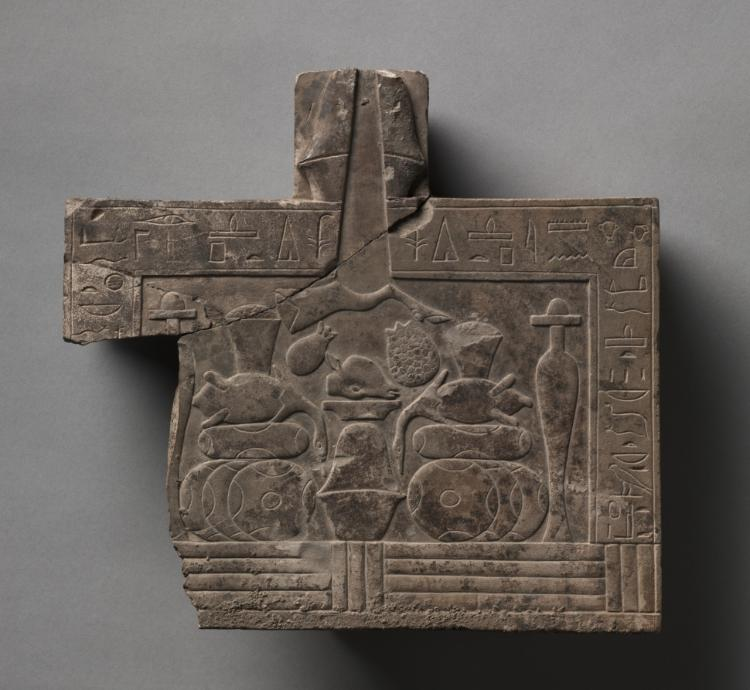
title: Offering Table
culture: Egypt, probably Thebes, New Kingdom (1540–1069 BCE) or later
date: 1069–656 BCE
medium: limestone, originally painted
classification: Sculpture